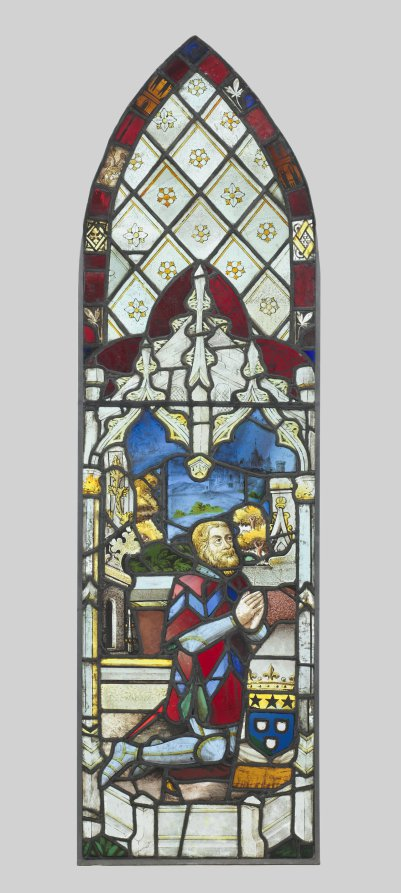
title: Stained Glass Panel with Male Donor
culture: France, 15th century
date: c. 1480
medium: pot metal, white glass with silver stain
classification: Glass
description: The origin of these stained glass panels is unknown. They depict a male and female donor, presumably husband and wife, who gaze upon a now-lost central panel. The object of their devotions was likely a crucified Christ or a standing figure of the Virgin Mary. The man, dressed in armor, and the woman, wearing a bejeweled and richly embroidered gown, are accompanied by their coats-of-arms (unidentified). They are undoubtedly members of an aristocratic elite who commissioned these windows, perhaps for a family chapel.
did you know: The brilliant colors of this stained glass panel were produced by adding different materials to molten glass, creating a reaction that resulted in specific colors. The metal supports for the individual pieces of glass are made from pot metal, an alloy, or mixture, of copper and iron.